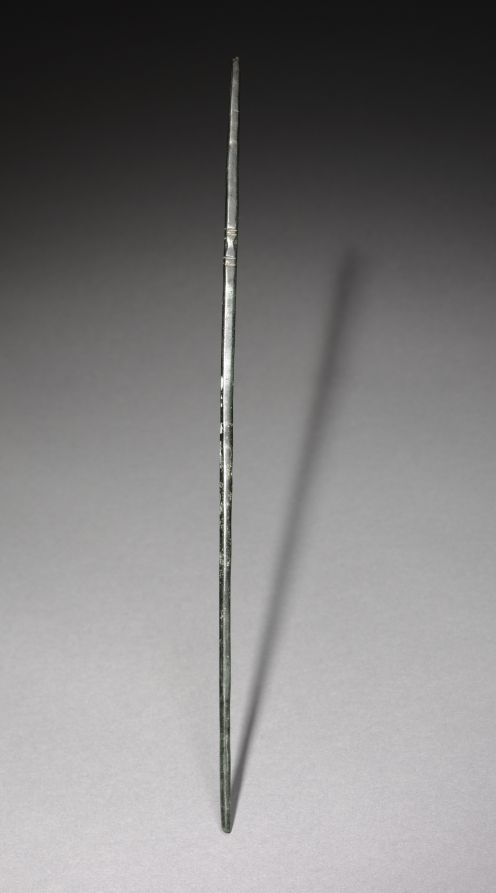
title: Chopstick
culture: Korea, Goryeo dynasty (918–1392)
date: 918–1392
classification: Metalwork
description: In Korea, chopsticks made of metal such as brass, silver, and gold were excavated from ancient tombs and ruins dated to the 6th century at the earliest. Burial goods often include utilitarian objects such as table wares and utensils because the dead were believed to need them in the afterlife.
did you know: In contrast to the Chinese and Japanese, Koreans still prefer metal chopsticks (stainless steel and brass) to wooden ones.